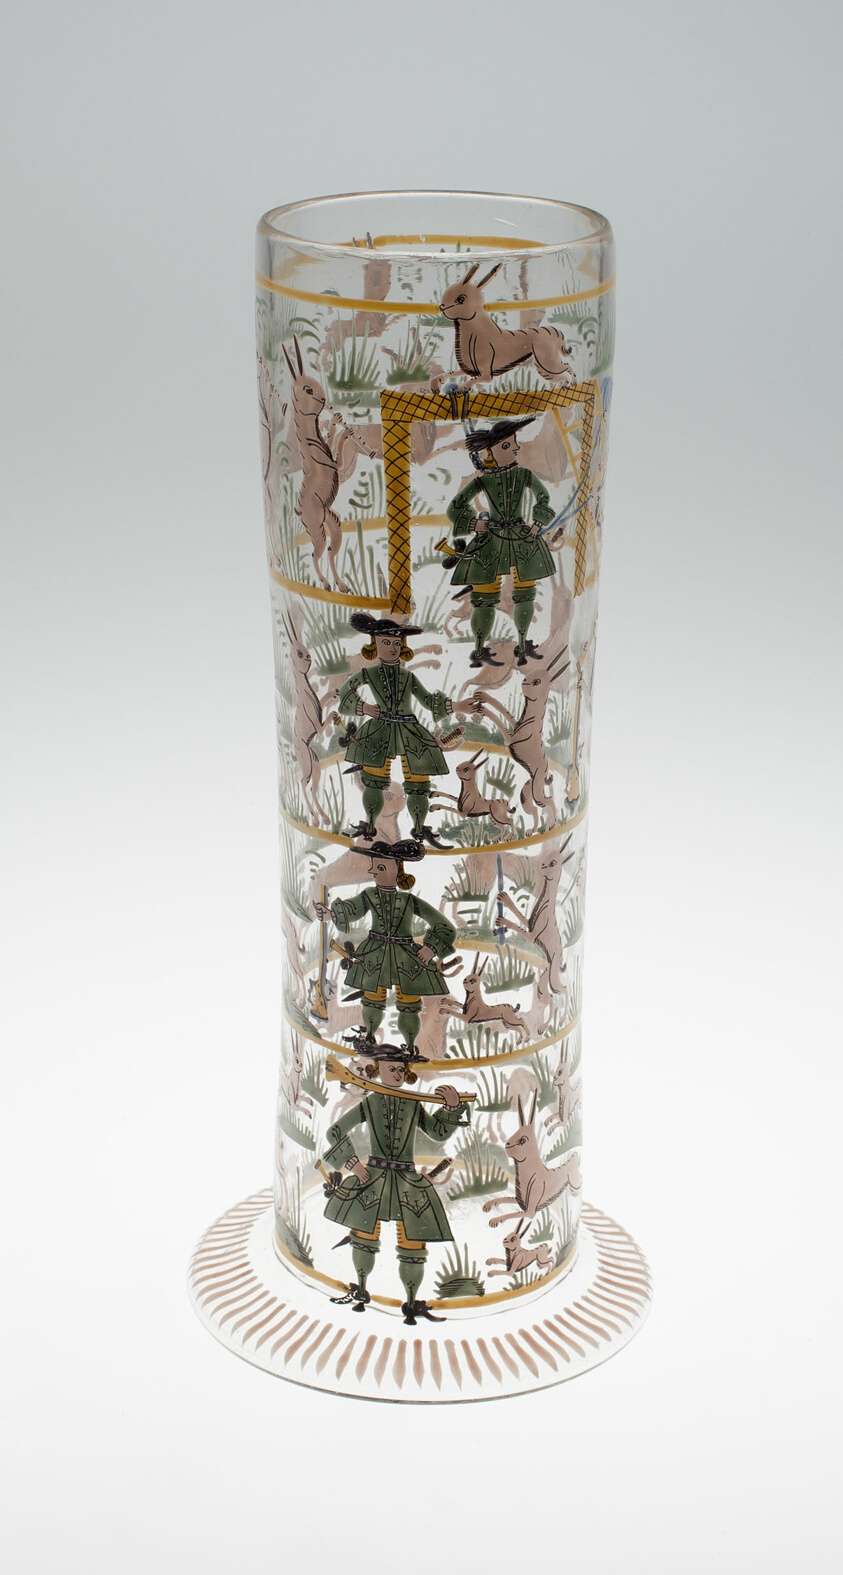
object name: Glass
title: Beaker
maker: Germany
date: 1650/1700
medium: Glass with polychrome enamels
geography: Germany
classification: drinking vessel; glass; european decorative arts